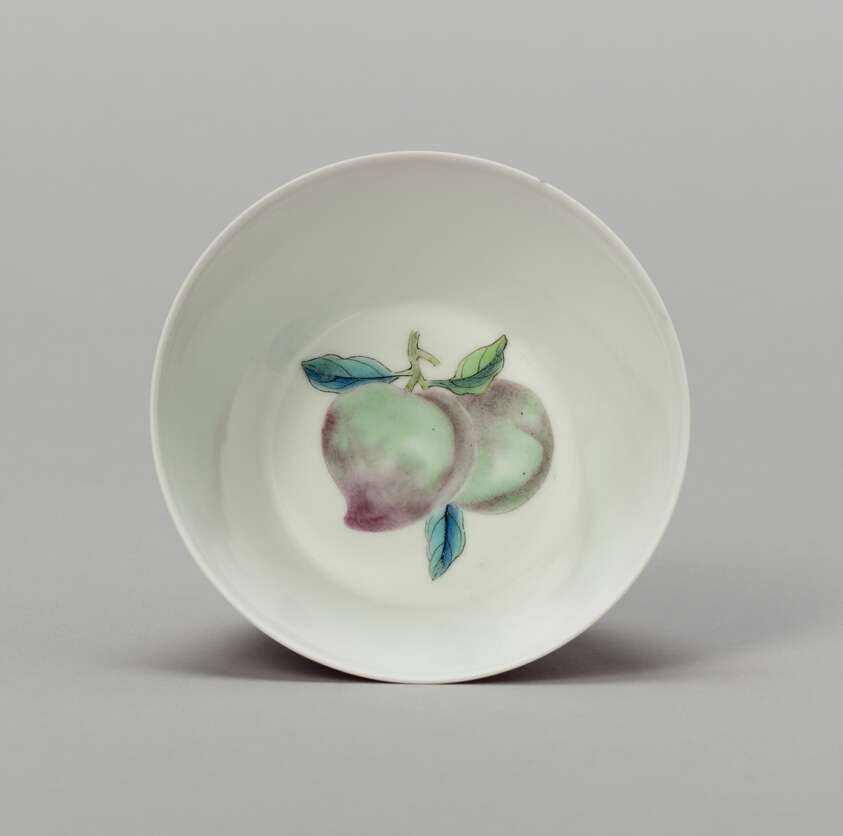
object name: Vessel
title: Cup with Stylized Fruit: Peaches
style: Chinese (culture or style)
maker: China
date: Qing dynasty (1644–1911), Kangxi reign mark and period (1662–1722)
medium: Porcelain painted with overglaze enamels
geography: China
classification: drinking vessel; porcelain; asian art; ceramics; vessel